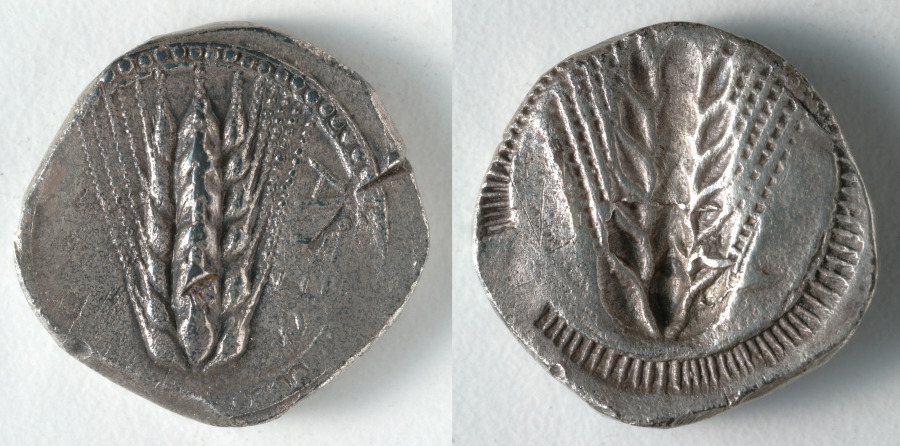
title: Stater: Barley (obverse); Barley, Incuse (reverse)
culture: Greek, minted at Metapontion (South Italy)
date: c. 530–510 BCE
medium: silver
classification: Coins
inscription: ΜΕΤΑ